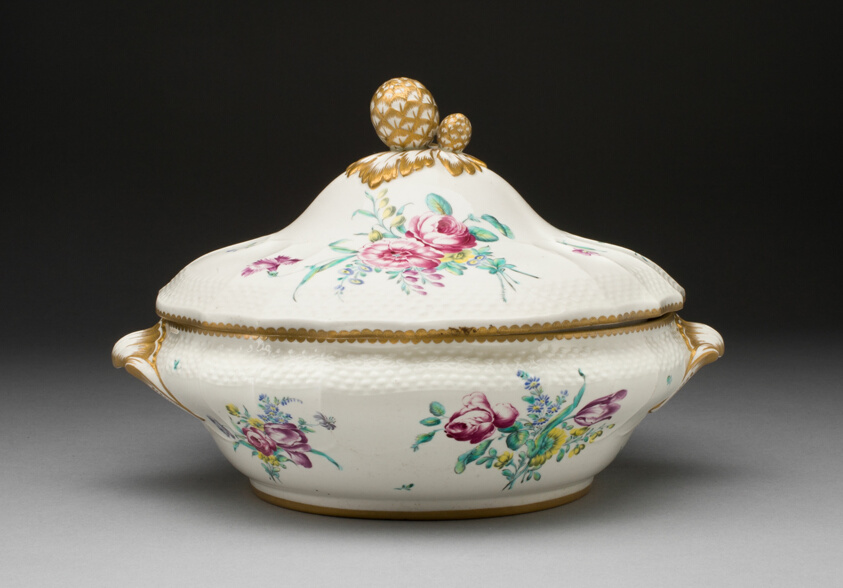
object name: Ceramics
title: Tureen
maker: France or Belgium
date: c. 1750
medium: Soft-paste porcelain, polychrome enamels, and gilding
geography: France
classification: tableware; porcelain; european decorative arts; ceramics